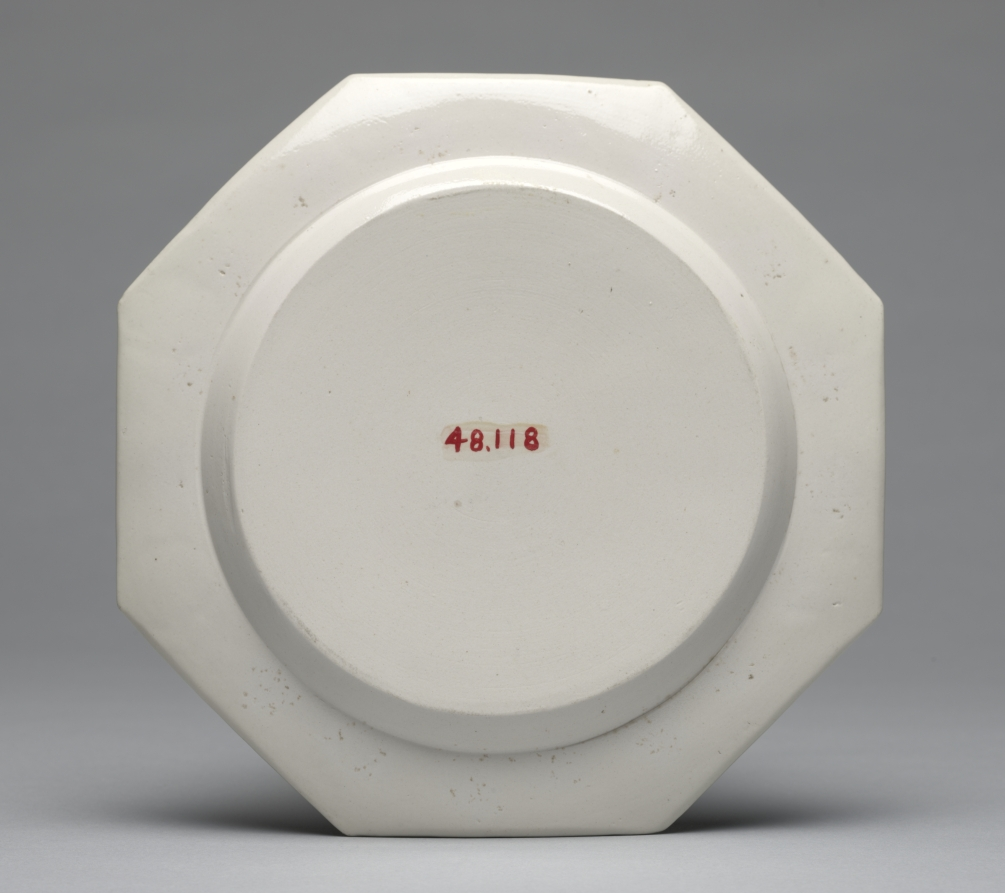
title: Plate Depicting the Soap Bubble Blower (La souffleuse de savon)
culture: England, Staffordshire, 18th century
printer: Jean Daulle (French, 1703–1763)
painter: after François Boucher (French, 1703–1770)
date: c. 1760–70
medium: salt-glazed, transfer-printed stoneware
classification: Ceramic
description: English potteries often courted aristocratic clients with cheaper wares that looked like more expensive works from the major centers of porcelain production in the eighteenth century, especially France, Germany, and China. In this case, the image printed in center of the plate depicts a young lady, enticing a boy with her skill at blowing soap bubbles through a thin pipe. The print was taken from an etching by Jean Daullé (French, 1703–1763), of the painting La souffleuse de savon (1758) by Francois Boucher (French, 1703–1770).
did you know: This plate depicts a young lady blowing soap bubbles next to a very interested young boy.